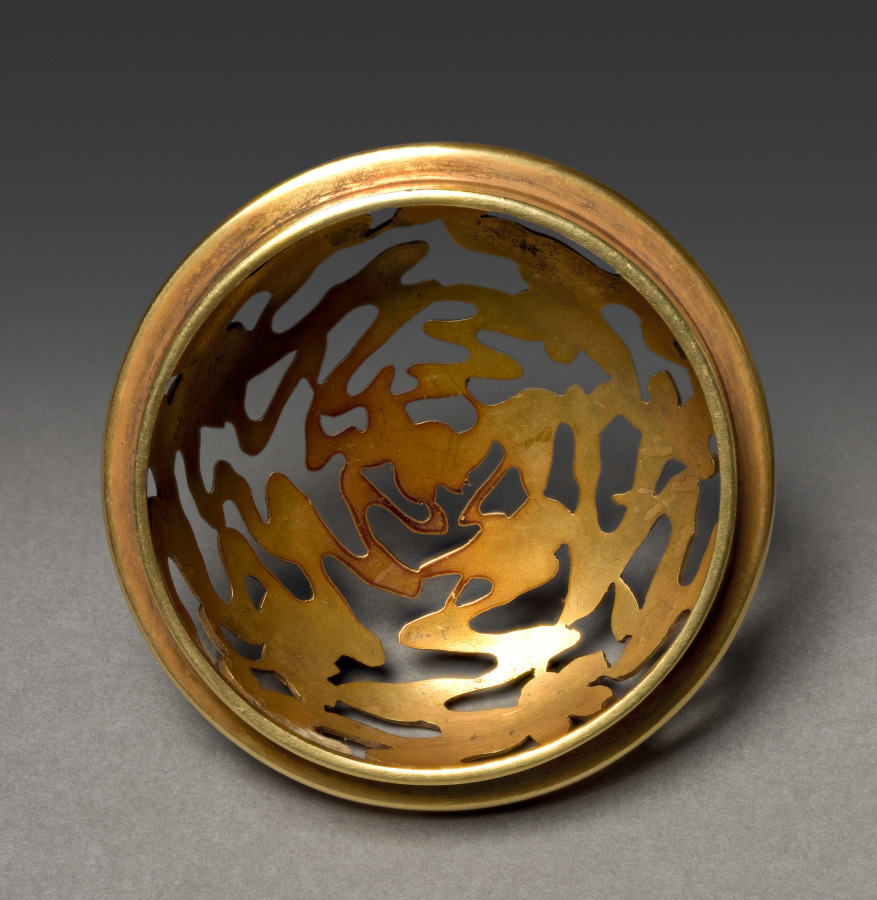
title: Incense Burner with Floral Scroll (lid)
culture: Japan, Edo period (1615–1868)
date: early to mid-1800s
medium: bronze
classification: Ceramic